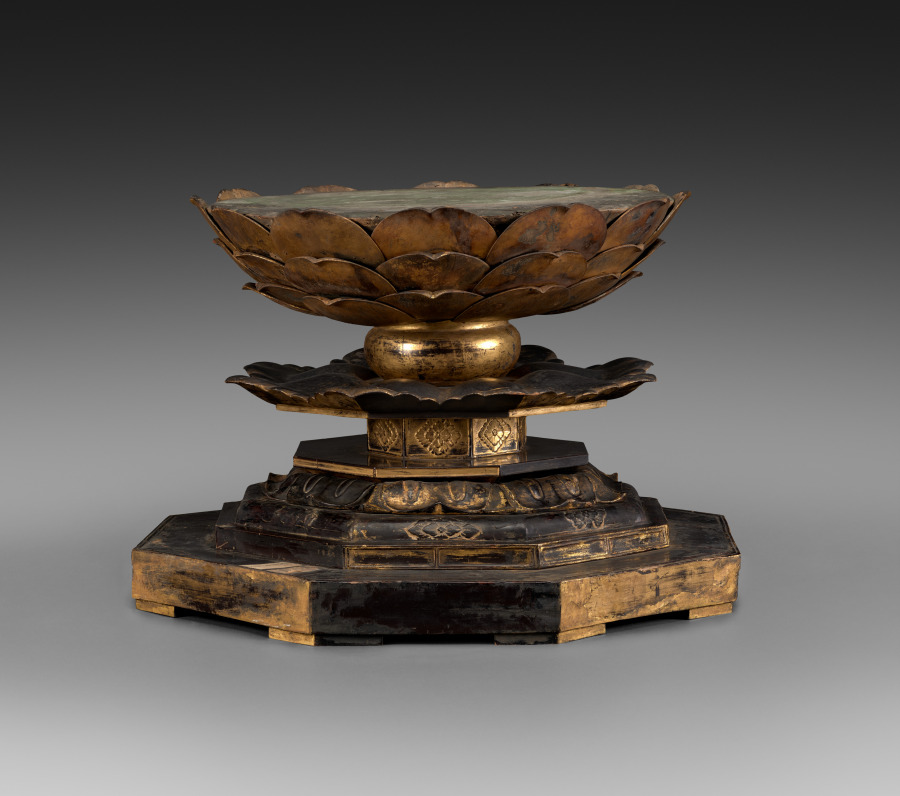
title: Seated Buddha (lotus pedestal)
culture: Japan, Heian period (794–1185)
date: 1100s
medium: gilded wood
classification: Sculpture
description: Composed of a number of hollowed-out pieces of wood that were then covered with lacquer and gilding, this sculpture would have served as the principal image of worship in a Buddhist temple hall. The Buddha Yakushi resides in the Lapis Lazuli Paradise of the East, and heals all diseases, including the ailment of ignorance. His left hand once held a medicine jar, while his right hand gestures reassurance. Seated on a lotus pedestal and backed by a mandorla and halo, the Buddha may have once been flanked by the bodhisattvas of the Sun and Moon, Nikkō and Gakkō, and protected by the Twelve Divine Generals, or Junishinshō.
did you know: This figure is depicted with a mudra, or hand gesture, that means "have no fear."